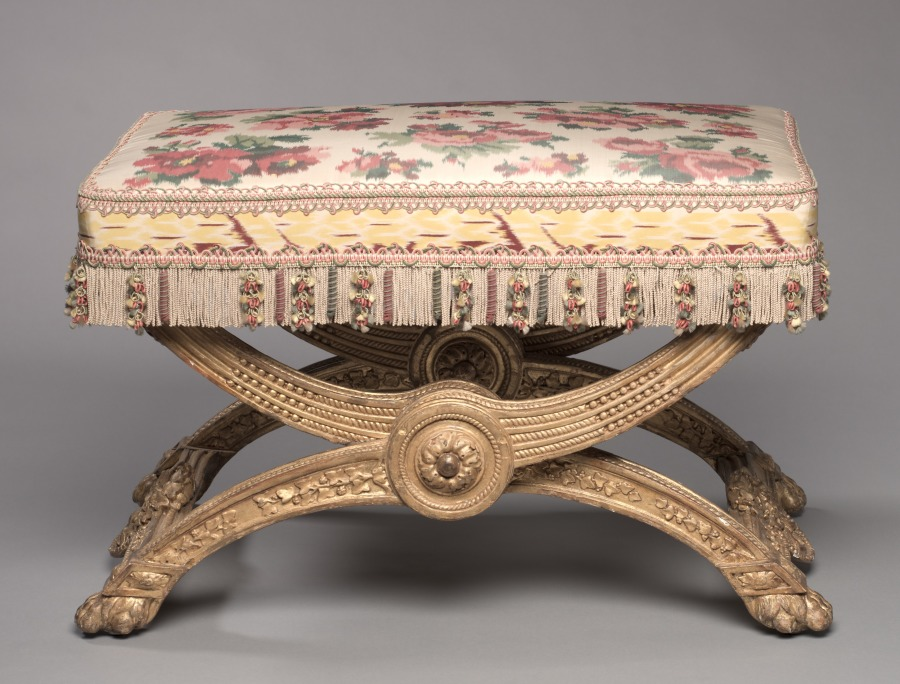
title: Stool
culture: France, 18th century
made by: Jean-Baptiste-Claude Sené (French, 1748–1803)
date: 1786–1787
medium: carved and gilded wood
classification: Furniture and woodwork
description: This stool was made in 1786-1787 for the Queen's gaming room at the palace of Compiègne.